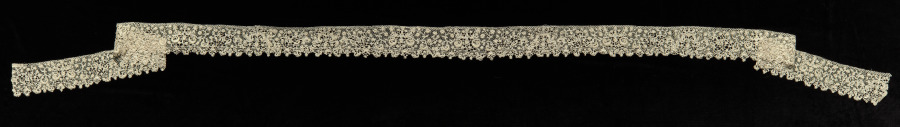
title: Lace Edging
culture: France or Italy(?)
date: 1660–1799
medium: Needle lace (Venetian Rose Point or variation of) and bobbin lace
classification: Lace